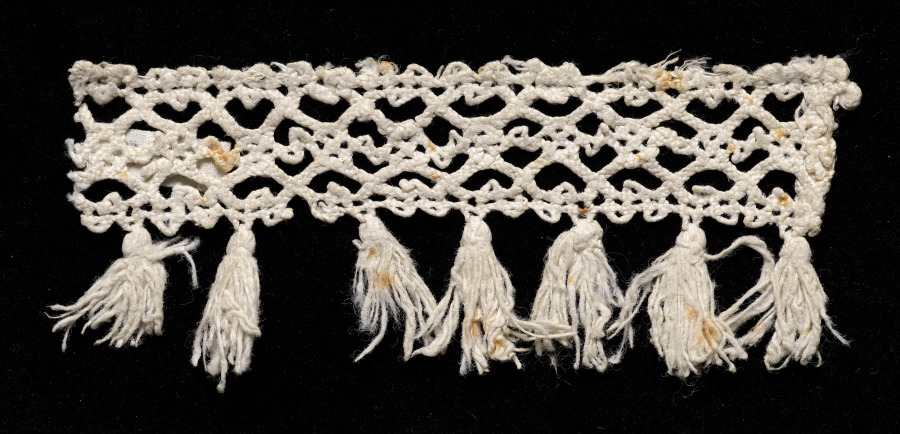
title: Lace Insertion with Fringe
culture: Italy, Venice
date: 1540–60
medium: Bobbin lace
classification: Lace